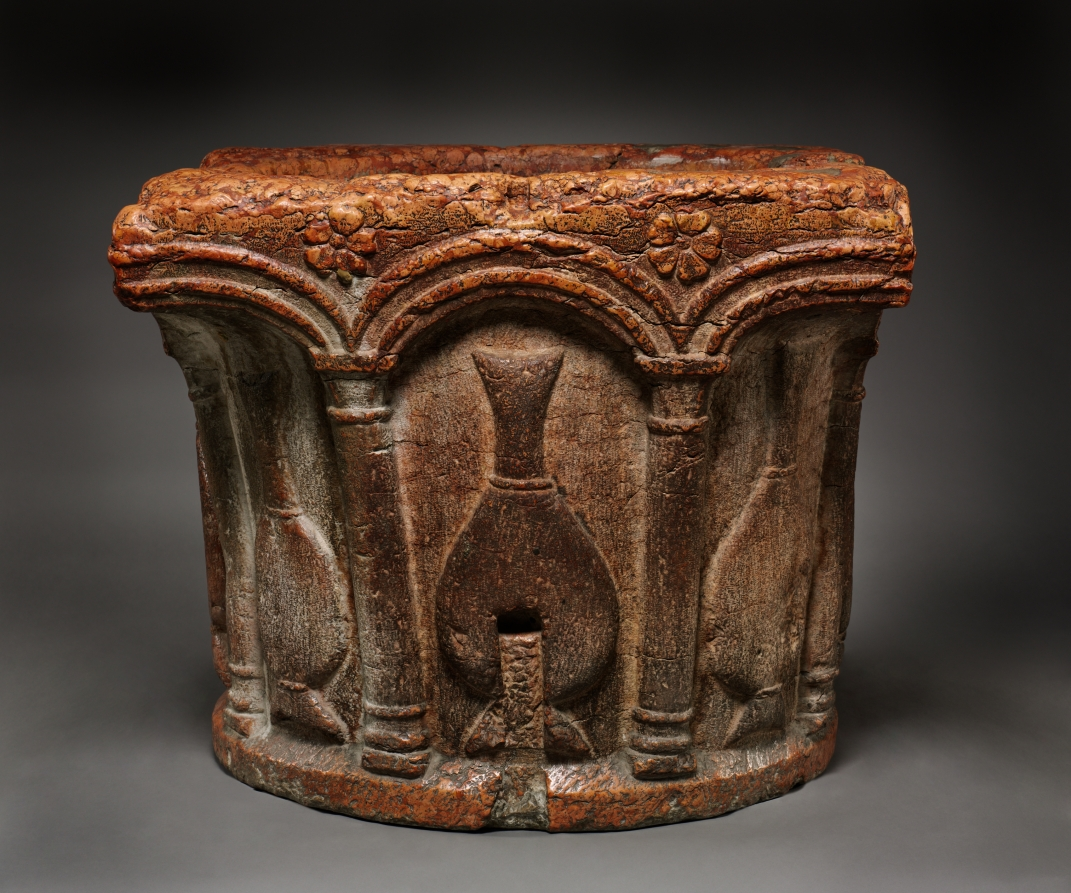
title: Well Head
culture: Italy, probably Verona, 15th century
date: 1400s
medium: pink limestone (called "Verona Marble")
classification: Sculpture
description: A well head is an architectural element that protects the mouth of a well. This example is both decorative and functional. The durable pink limestone well head facilitated access to the water whose restorative nature is echoed in the flowers and vases that ornament its surface.